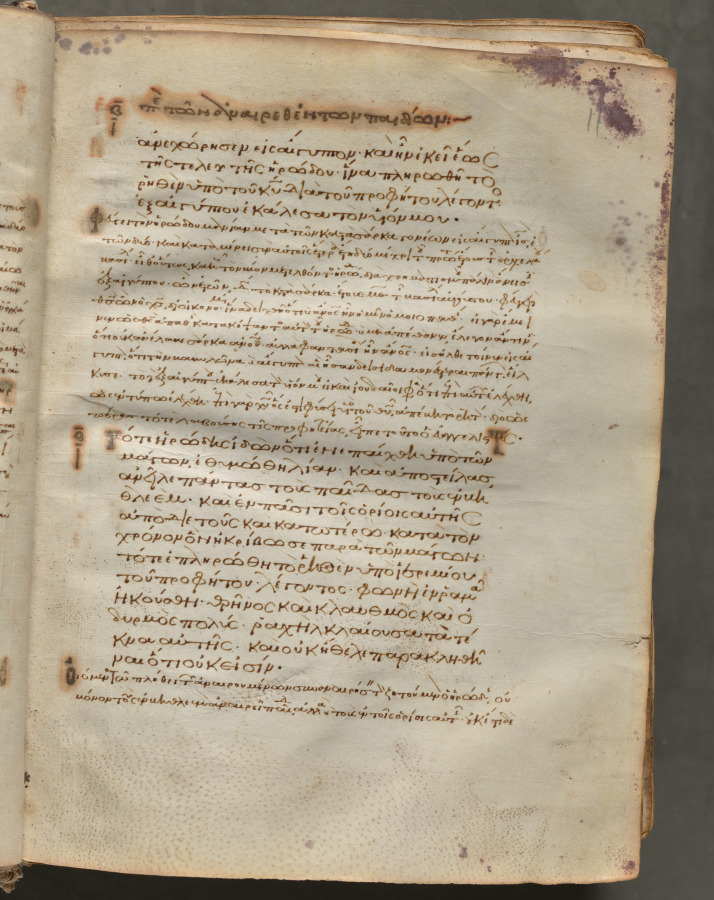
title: Text, folio 11 (recto), from a Gospel Book with Commentaries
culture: Byzantium, Constantinople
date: c. 1000–1100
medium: ink, tempera, and gold on vellum; leather binding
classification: Bound Volume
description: Each of the four gospels in this book opens on a page with brilliantly illuminated borders depicting the author of the text as well as birds-principally peacocks, symbols of the immortality of the soul-and fountains, representing the fountain of life and the salvation of the soul. This volume consists of 428 leaves with texts in Greek. Its level of sophistication suggests that it was probably written and decorated in a monastery in Constantinople.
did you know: Gospel Books were carried in procession through Byzantine churches.